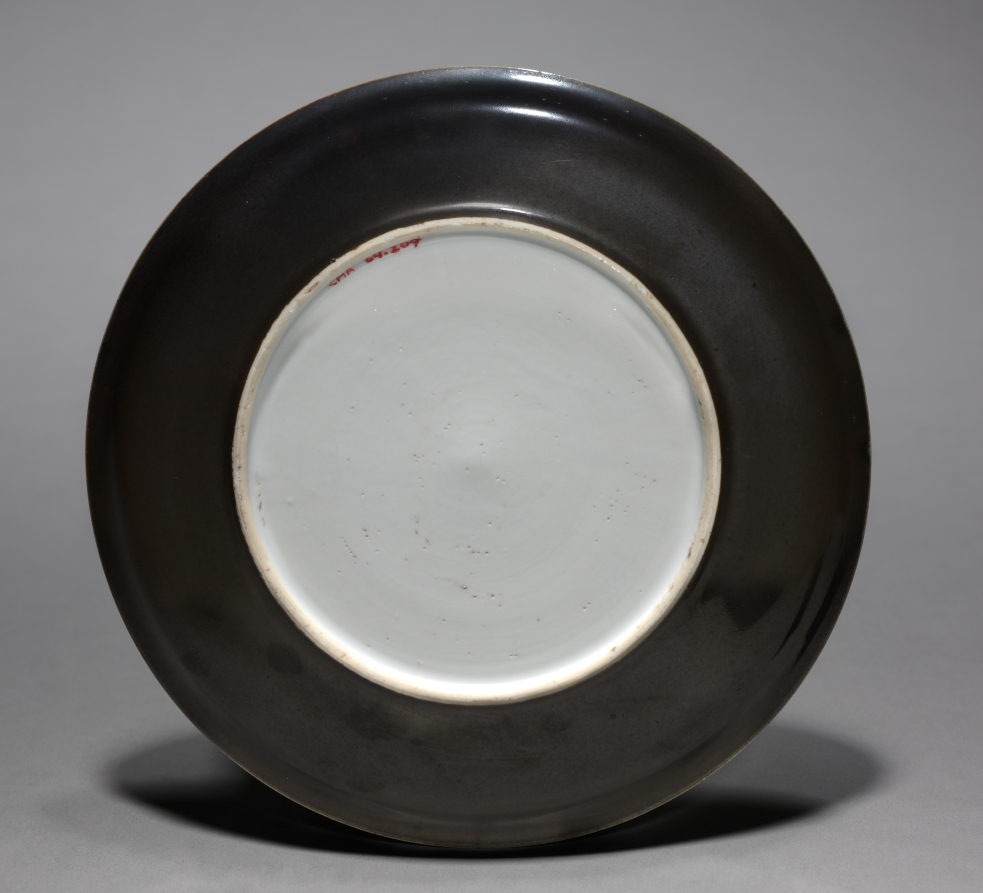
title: Dish with Bird on Chrysanthemum Spray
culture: China, Jiangxi province, Jingdezhen kilns, Qing dynasty (1644-1911), Kangxi reign (1661-1722)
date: 1661–1722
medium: porcelain with mirror black glaze painted with gold decoration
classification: Ceramic